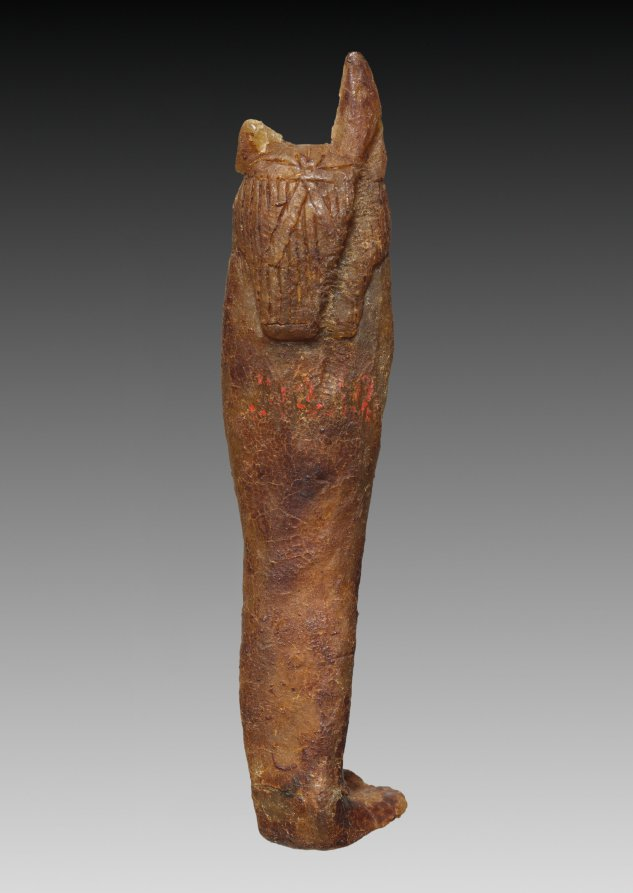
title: Son of Horus: Duamutef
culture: Egypt, Third Intermediate (1069–715 BCE), Dynasties 21–22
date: 1000–900 BCE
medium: wax with dark amber varnish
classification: Funerary Equipment